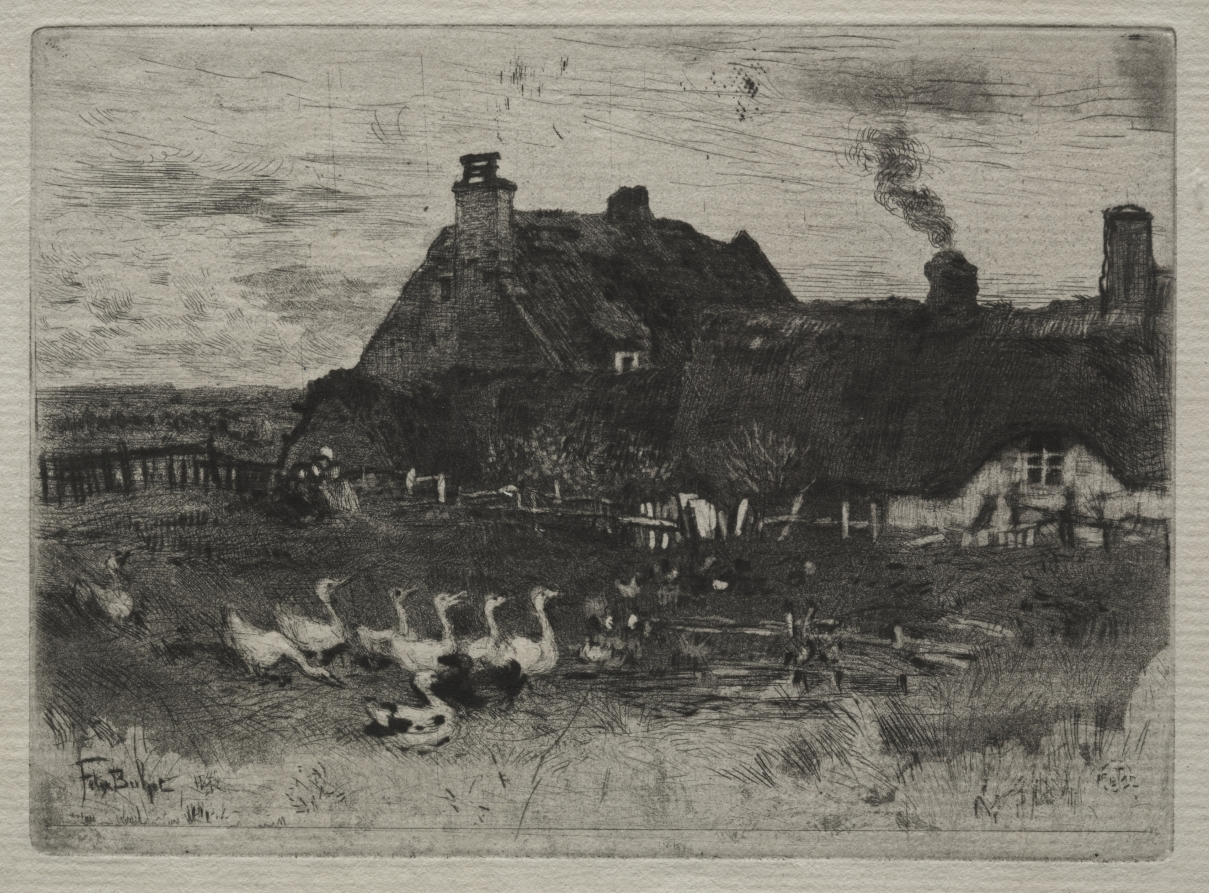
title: Thatched Cottages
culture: France, 19th century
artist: Félix Hilaire Buhot (French, 1847–1898)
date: 1878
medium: etching, drypoint and aquatint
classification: Print